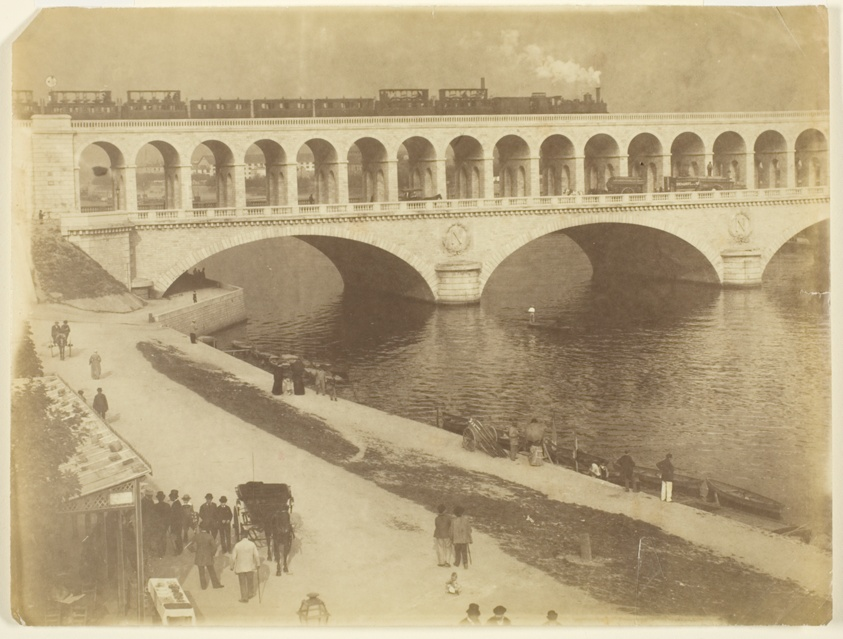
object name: Photograph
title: Untitled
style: 19th century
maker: Artist unknown; American, active 19th century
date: 1870/79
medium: Albumen print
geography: United States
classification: albumen silver print; photographic process; photography; photograph